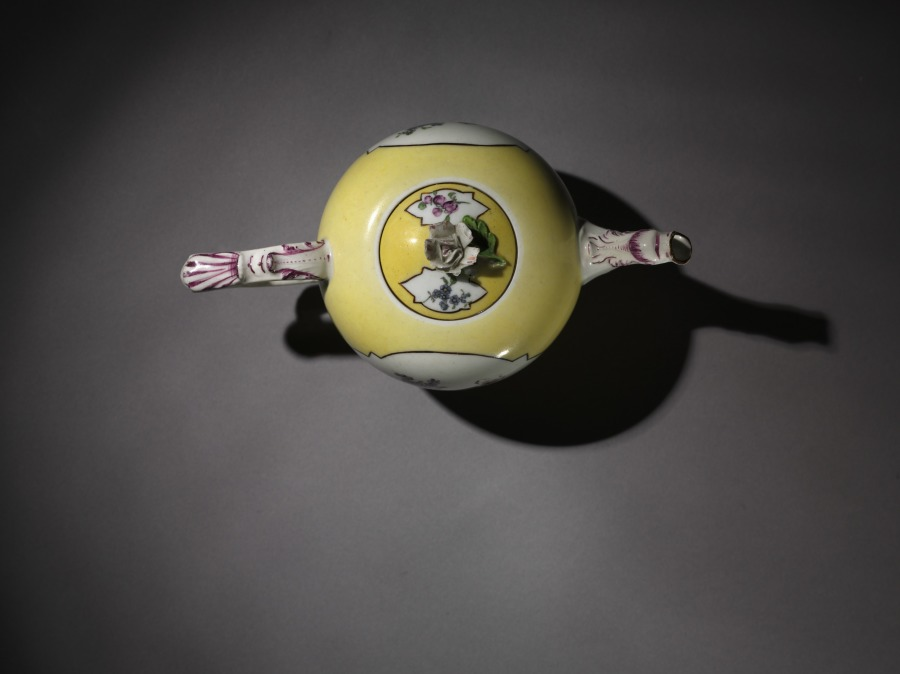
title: Teapot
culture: Germany, Meissen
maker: Meissen Porcelain Factory (German, est. c. 1710)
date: c. 1750–70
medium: porcelain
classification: Ceramic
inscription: Mark on the bottom that looks like two swords crossing, with a small V intersecting.